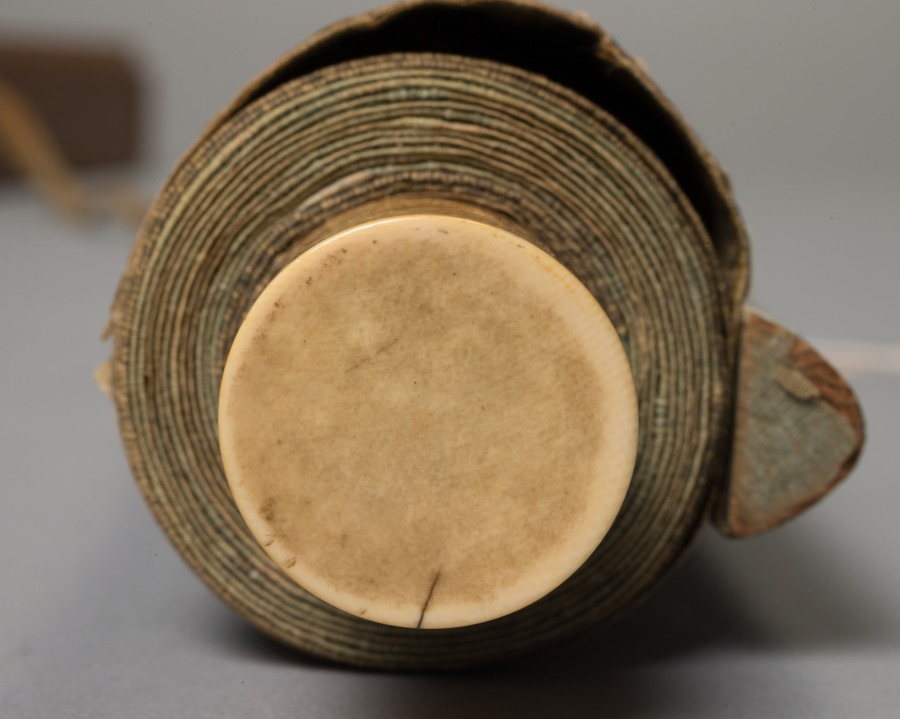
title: Bamboo in Rain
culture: Japan, Muromachi period (1392–1573)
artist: attributed to Genga (Japanese)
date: early 1500s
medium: hanging scroll; ink on silk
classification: Painting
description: East Asian paintings from China, Korea, and Japan were frequently conceived as sets of multiple images. These sets might have been composed for specific palace or temple rooms, or to portray a specific theme, such as the four seasons. Over time, the original intent of such sets is often lost through damage, changes in ownership, or a variety of other reasons. The identity of the artist can also be lost, but then, sometimes, retrieved. This pair of ink paintings has traditionally been labeled as Japanese and attributed to the 16th-century painter Genga. Since there are no seals or signature of the artist on the painting, this attribution was based on comparisons of brush style with paintings known to be by Genga. More recent study indicates that while the 16th century is an appropriate time frame for the pair, the precise cultural identity of the artist is not certain after all. The dark, eccentric shapes of the rocks and bamboo clusters and the dramatic tonal contrasts evident throughout the composition point to either Korean authorship or influence upon a Japanese painter of the period.